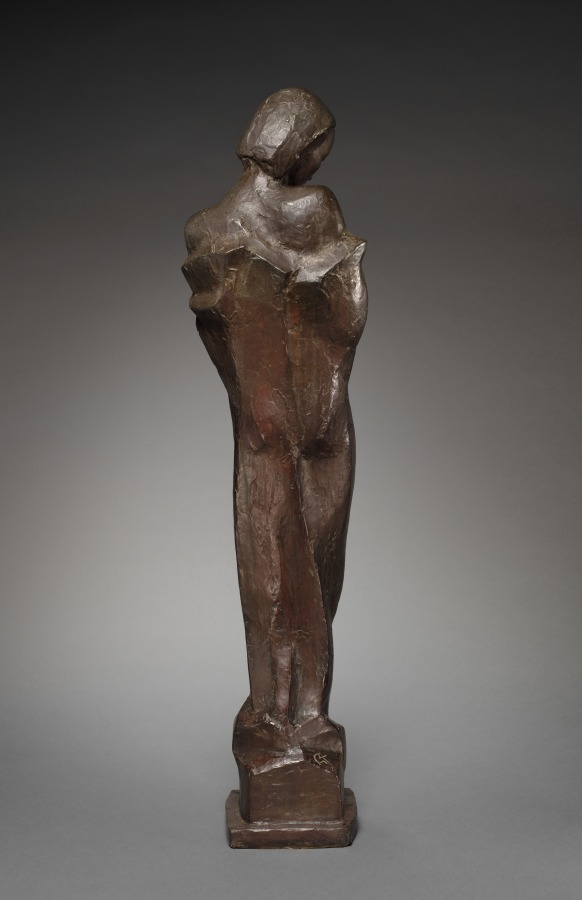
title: Adagio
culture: Germany, 20th century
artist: George Kolbe (German, 1877–1947)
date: 1923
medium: gilt bronze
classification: Sculpture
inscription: Signed lower left corner: "GK II"